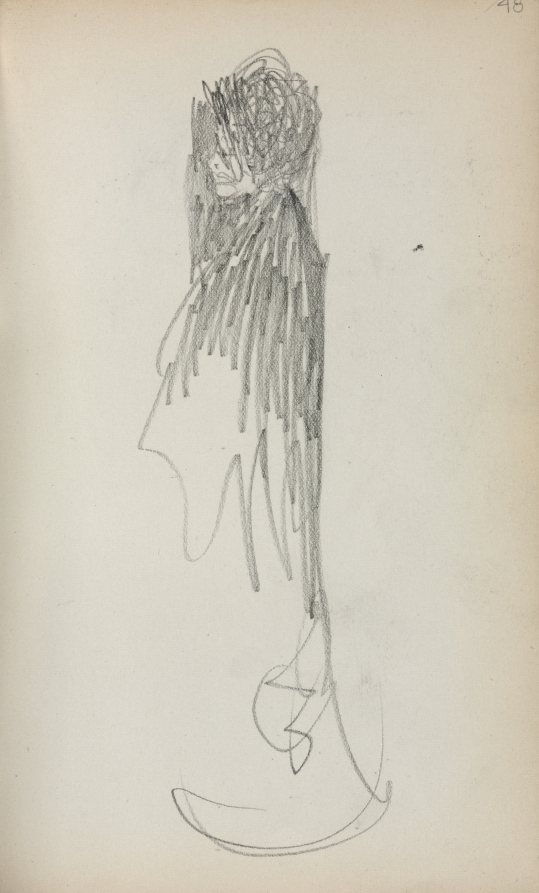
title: Italian Sketchbook: Standing Woman in profile (page 48)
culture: America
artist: Maurice Prendergast (American, born Newfoundland [now Canada], 1858–1924)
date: 1898–1899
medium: pencil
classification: Bound Volume